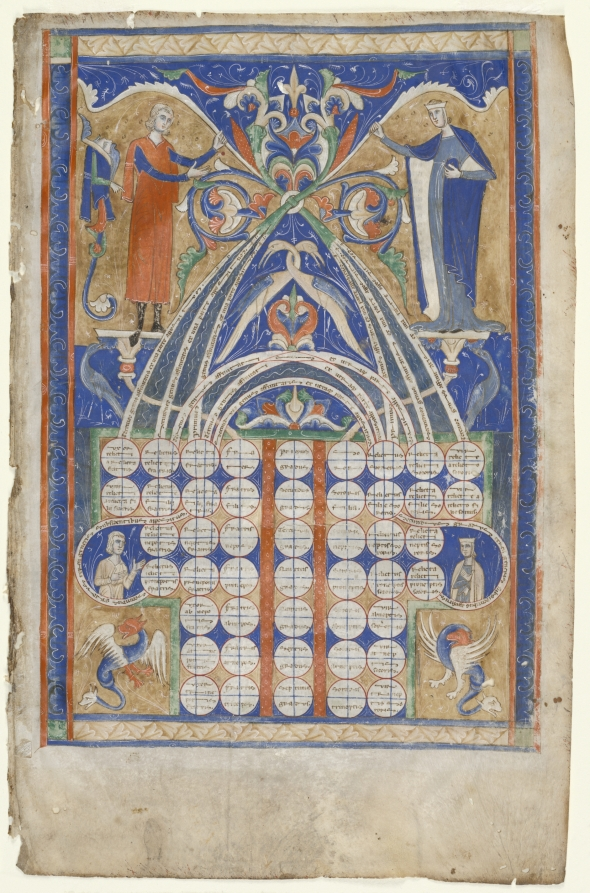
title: Leaf from Gratian's Decretum: Table of Affinity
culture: Italy, probably Naples, 13th century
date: c. 1270–1300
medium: tempera and gold on parchment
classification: Manuscript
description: These leaves were excised from a copy of the handbook of canon law known simply as the Decretum written by Gratian, an Italian Camaldolese monk, in Bologna around 1130-40. The Decretum was widely copied and consulted throughout the Middle Ages. These tables were used to determine relationships created by marriage. During the Middle Ages such relationships of "affinity" could be impediments to subsequent marriages if one partner were to die. In the direct line, for example, a man may not marry his mother-in-law or his daughter-in-law, while in the collateral line a man may not marry his uncle's wife or his wife's first cousin or niece. Like Tables of Consanguinity, Tables of Affinity were used by church officials to approve or deny marriages.